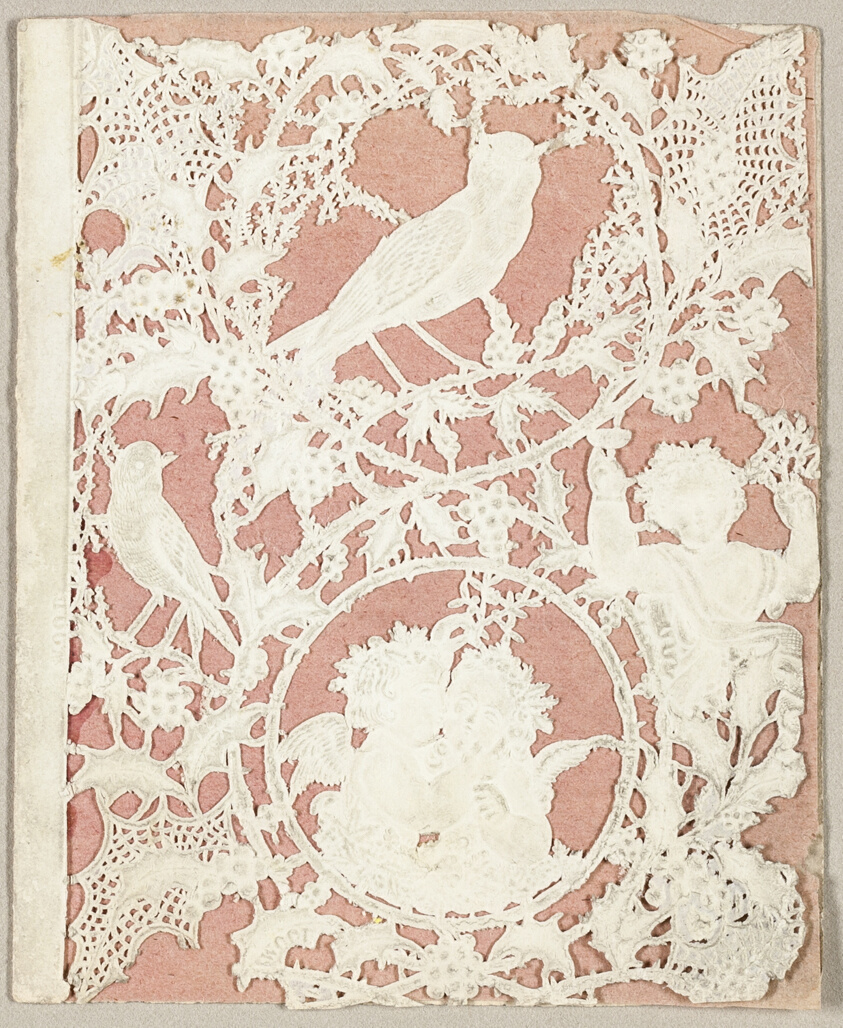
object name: Print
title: Untitled Valentine (Putti and Birds)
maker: Thomas Wood (English, 19th century)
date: 1860/69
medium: Cut and embossed (designed) ivory wove paper with pink wove paper insert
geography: England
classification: collage; valentine; prints and drawing; print